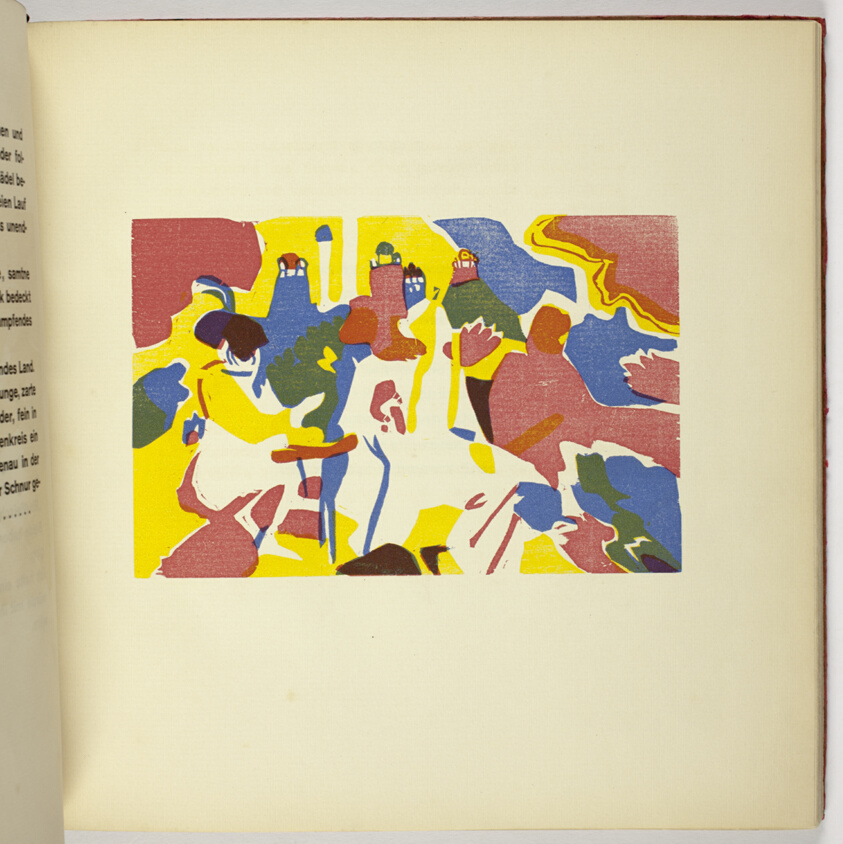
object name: Book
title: Klänge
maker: Vasily Kandinsky (French, born Russia, 1866-1944); published by R. Piper & Co. (German, 20th century)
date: 1907–12, published 1913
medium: Book with fifty-six woodcuts, forty-four in black and twelve in color, on cream laid paper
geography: France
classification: woodcut; book; library/archives; prints and drawing